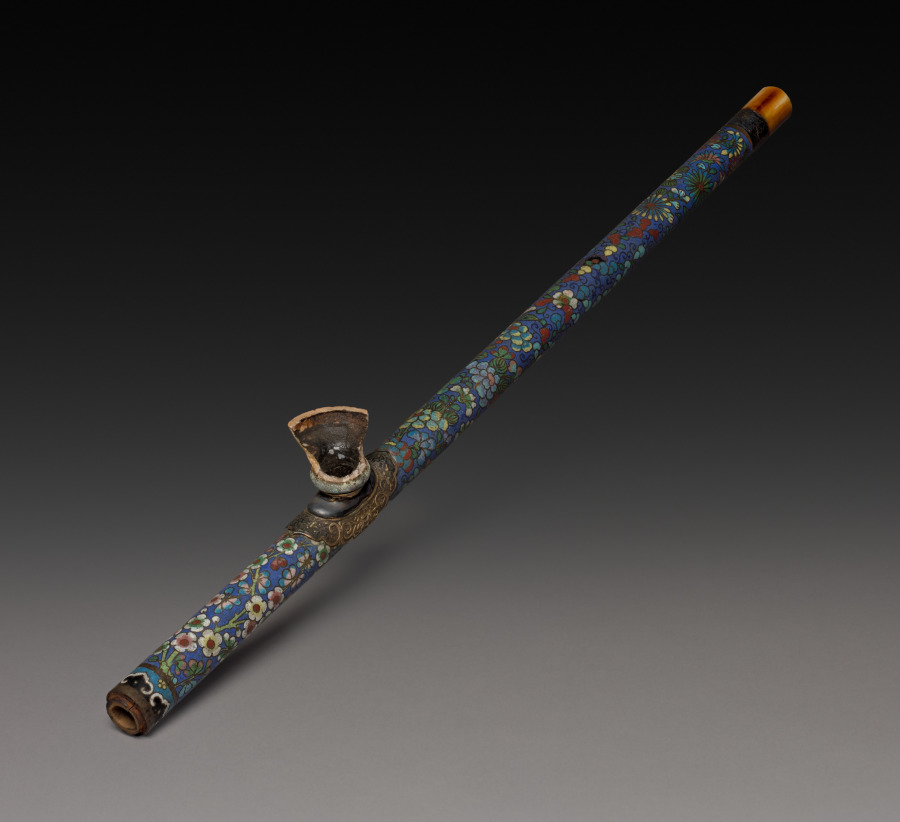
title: Opium Pipe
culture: China, Qing dynasty (1644-1911)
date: 1800s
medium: cloisonné enamel and ivory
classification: Miscellaneous